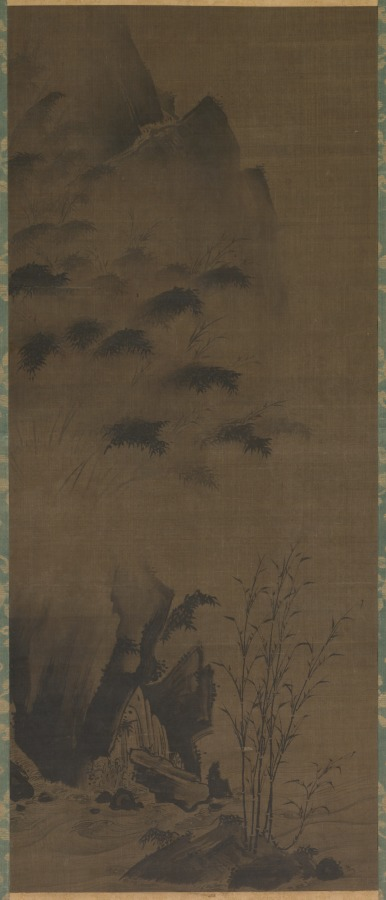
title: Bamboo in Rain; Bamboo in Wind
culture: Japan, Muromachi period (1392–1573)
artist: Genga (Japanese)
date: early 1500s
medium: hanging scroll; ink on silk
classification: Painting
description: East Asian paintings from China, Korea, and Japan were frequently conceived as sets of multiple images. These sets might have been composed for specific palace or temple rooms, or to portray a specific theme, such as the four seasons. Over time, the original intent of such sets is often lost through damage, changes in ownership, or a variety of other reasons. The identity of the artist can also be lost, but then, sometimes, retrieved. This pair of ink paintings has traditionally been labeled as Japanese and attributed to the 16th-century painter Genga. Since there are no seals or signature of the artist on the painting, this attribution was based on comparisons of brush style with paintings known to be by Genga. More recent study indicates that while the 16th century is an appropriate time frame for the pair, the precise cultural identity of the artist is not certain after all. The dark, eccentric shapes of the rocks and bamboo clusters and the dramatic tonal contrasts evident throughout the composition point to either Korean authorship or influence upon a Japanese painter of the period.